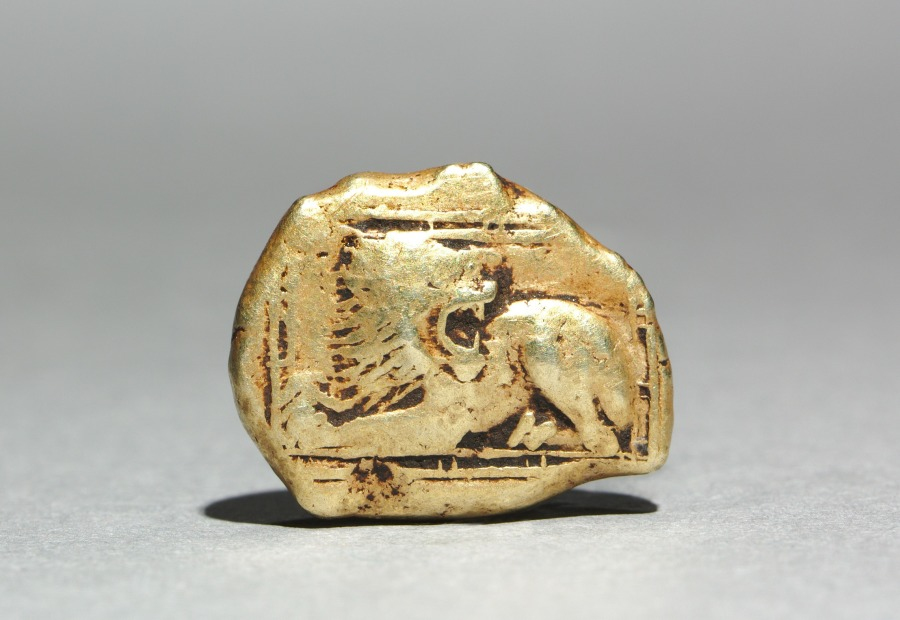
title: Stater: Lion (obverse); Incuse Punches (reverse)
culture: Greek, minted at Miletos (Ionia)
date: 600–550 BCE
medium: Electrum (gold-silver alloy)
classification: Coins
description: The lion, king of the beasts and an animal associated with regal and heroic power, featured prominently on the coinage of many ancient Greek city-states. Artists placed the lion in a variety of poses, sometimes including the whole body, at other times the foreparts or just the head. Although it may once have roamed nearby, for many Greeks the lion was a monster nearly as exotic as the Chimaera, of which it formed a part, together with a goat head and snake-headed tail.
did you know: Many early Greek coins are made from electrum, a naturally occurring alloy of gold and silver.